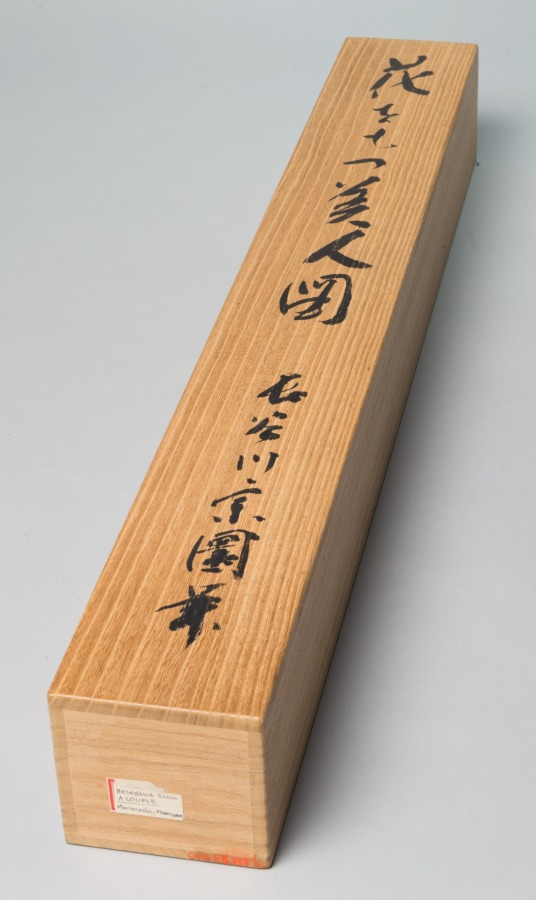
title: A Couple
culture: Japan, Momoyama period (1573–1615)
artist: Hasegawa Sōen (Japanese)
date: late 1500s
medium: hanging scroll; ink on paper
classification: Painting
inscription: Artist's seal at lower left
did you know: The person on the right holds a spray of chrysanthemums, while the other has daffodils suspended upside down from a stalk held over their shoulder.